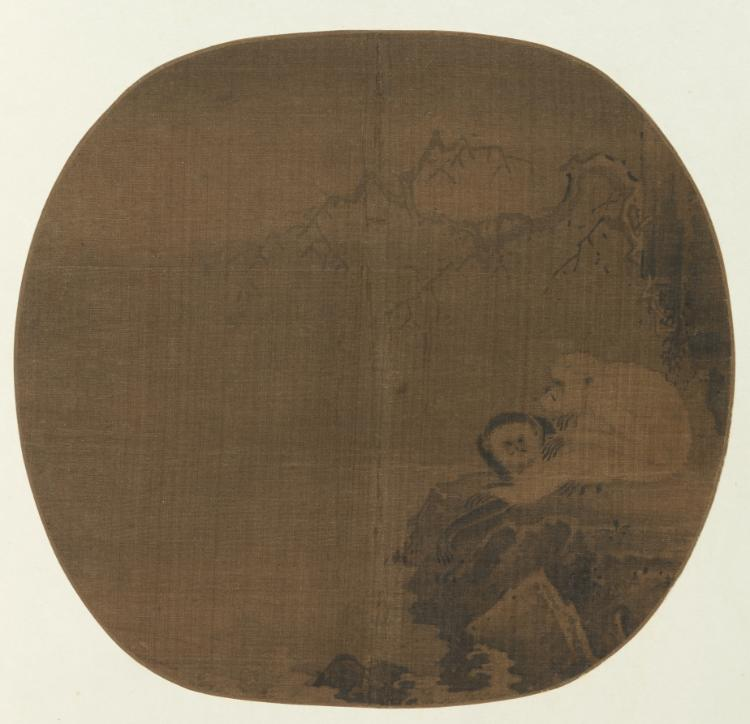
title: Monkey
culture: China, Yuan dynasty (1271-1368)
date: late 1200s–1300s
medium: album leaf, ink on paper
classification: Painting